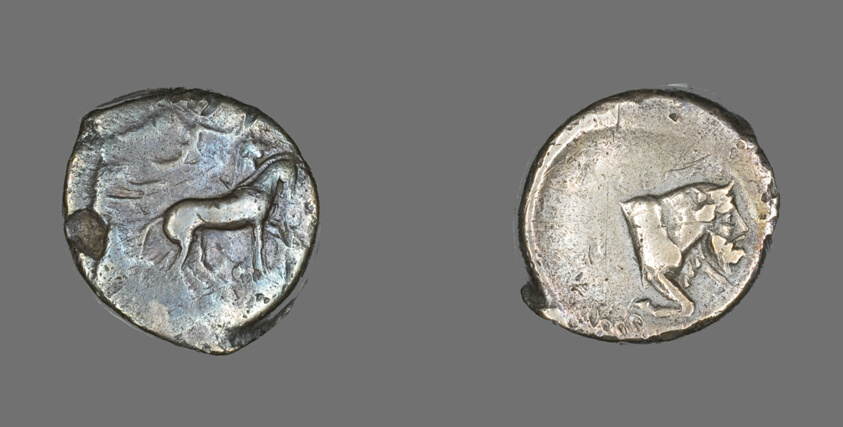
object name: Coin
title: Tetradrachm (Coin) Depicting Quadriga and Charioteer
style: greek, ancient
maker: Greek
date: 460-430 BCE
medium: Silver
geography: Greece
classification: coin; ancient art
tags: Chariots